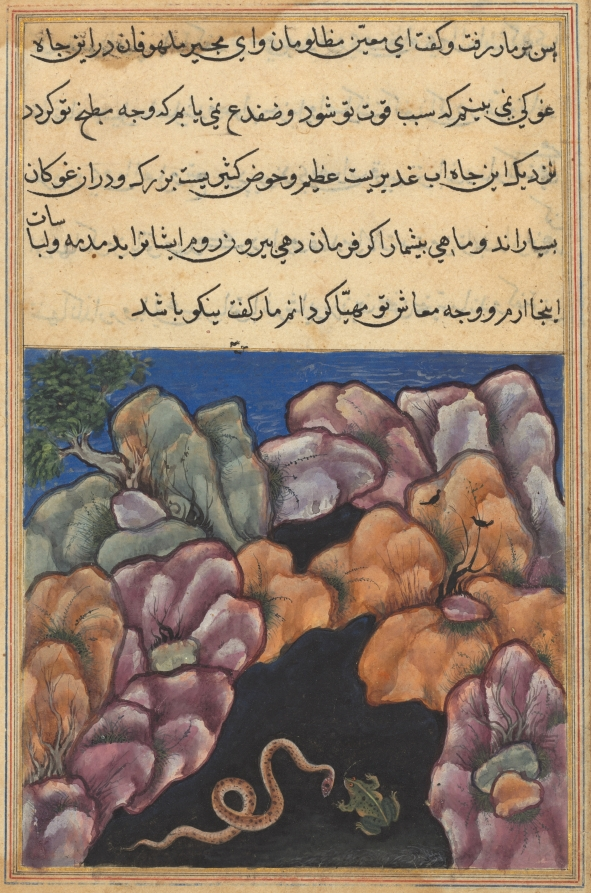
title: The snake enters into an argument with the frog, from a Tuti-nama (Tales of a Parrot): Twenty-sixth Night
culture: Mughal India, court of Akbar (reigned 1556–1605)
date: c. 1560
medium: gum tempera, ink, and gold on paper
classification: Painting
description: Cave compositions were replicated for multiple types of scenes in India, based on Persian models like the Shah-nama painting CMA 1988.96.a. The black background of the caves in the Tuti-nama provides the viewer a window into a subterranean space, the mouth of which is shown amid the rocks above. Shapur, the exiled frog tyrant, asked a snake to devour his enemies. However, when the snake became hungry again, he ate Shapur’s friends and family. Without any subjects to rule, the frog escaped his dangerous ally and lived out his life, sad and alone.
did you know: The story takes place in China.